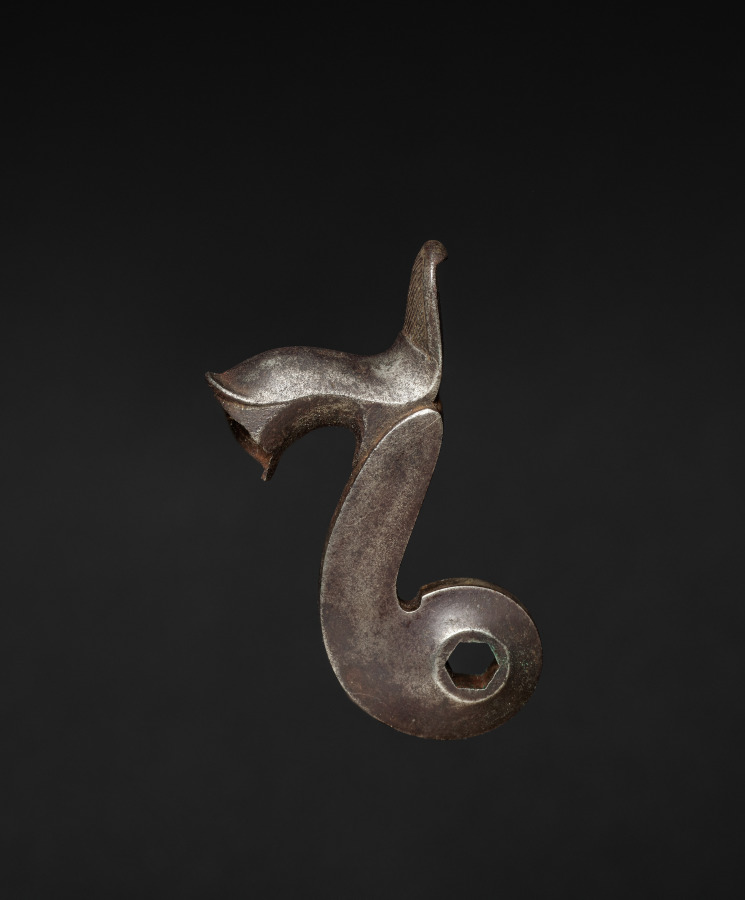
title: Gun-Lock Hammer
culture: England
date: c. 1800–1825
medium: steel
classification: Arms and Armor